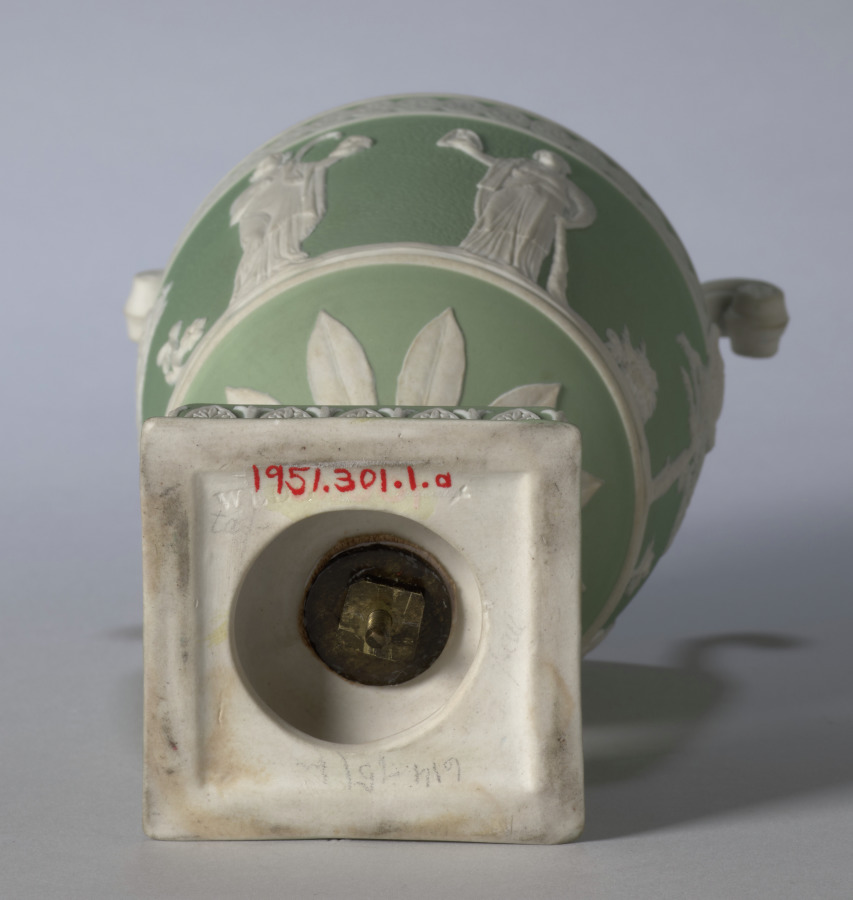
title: Urn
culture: England, Staffordshire, late 18th-early 19th Century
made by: Wedgwood Factory (British)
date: c. 1800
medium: jasper ware with relief decoration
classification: Ceramic